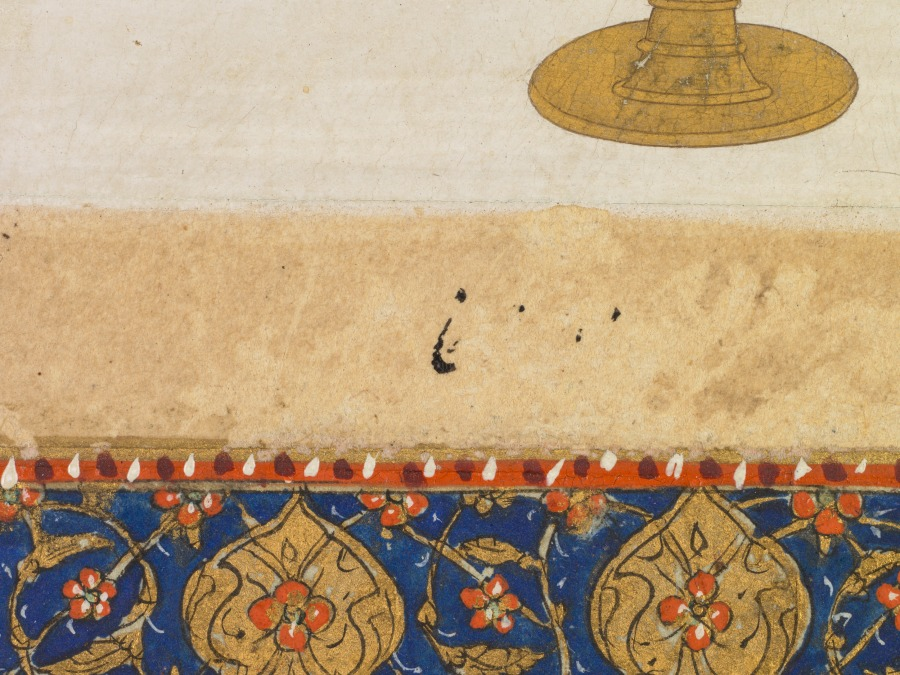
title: The Dream of Zuleykha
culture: India, Lucknow, Mughal, 18th century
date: c. 1770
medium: Gum tempera and gold on paper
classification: Painting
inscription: verso: inscribed at lower left: Hazrat Yusuf alayhi al - salaam ("the prophet Joseph on him be peace")